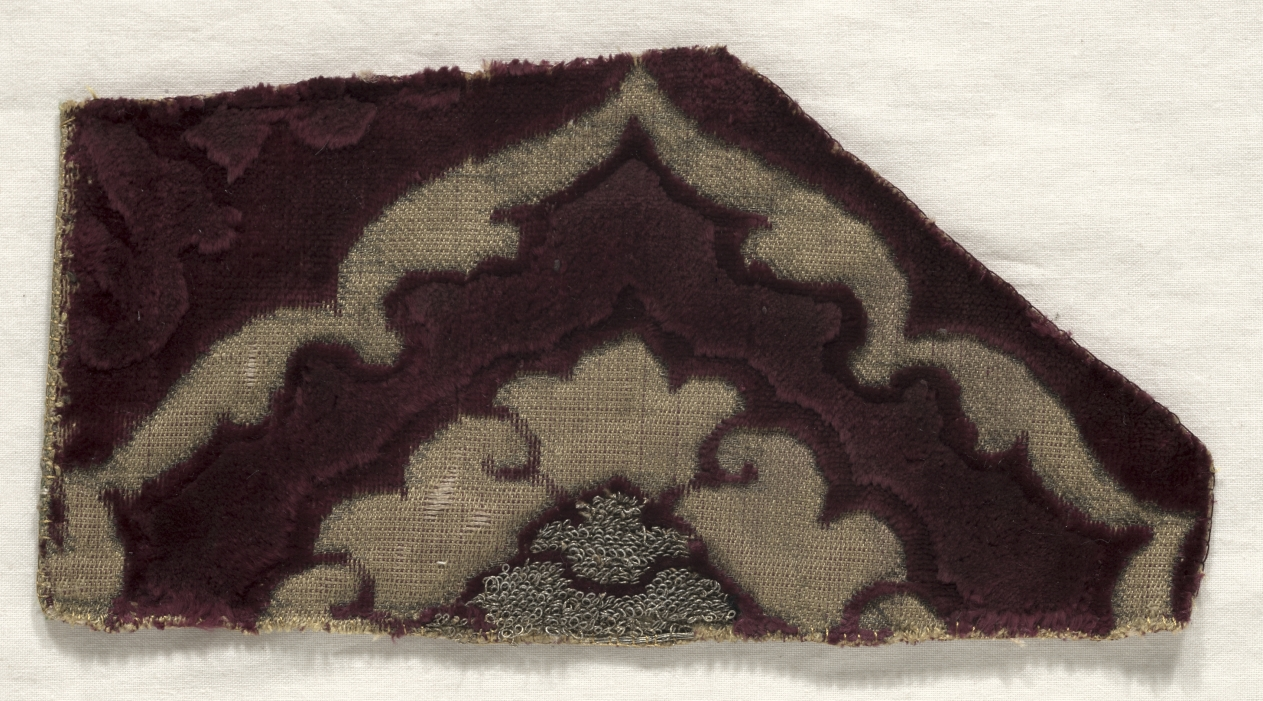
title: Velvet Fragment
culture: Italy or Spain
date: 1400s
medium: velvet weave (cut with two heights of pile, voided, brocaded): silk and gold thread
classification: Velvet